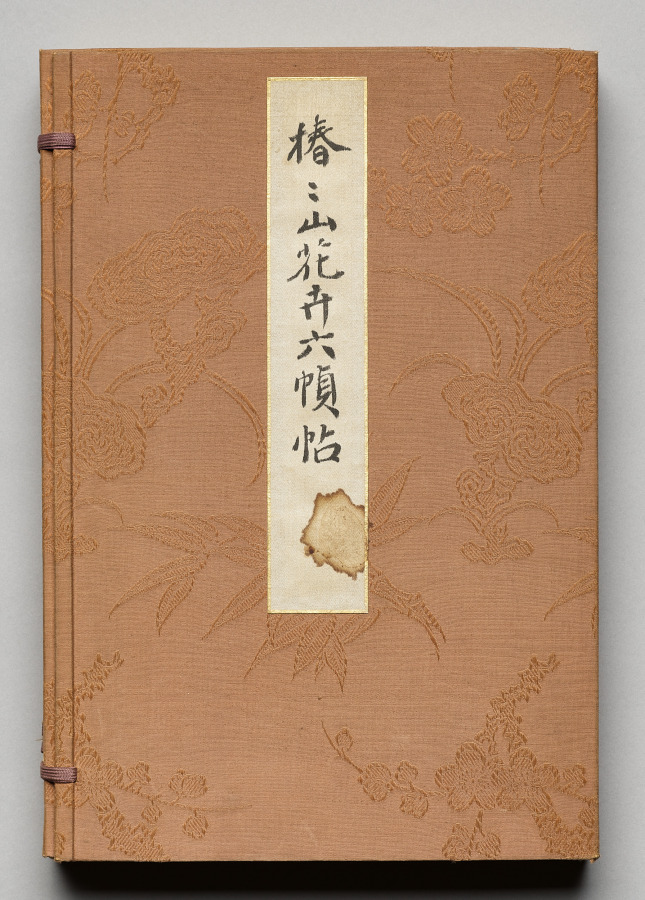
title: Flowers and Grasses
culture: Japan, Edo period (1615–1868)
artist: Tsubaki Chinzan (Japanese, 1801–1854)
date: 1841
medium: folding-album with six leaves of paintings; preface in ink on paper; paintings in ink and color on silk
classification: Bound Volume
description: This album contains six small paintings, each of which takes a different plant as its subject. The paintings include depictions of pomegranates, as well as flowering narcissus and orchid.